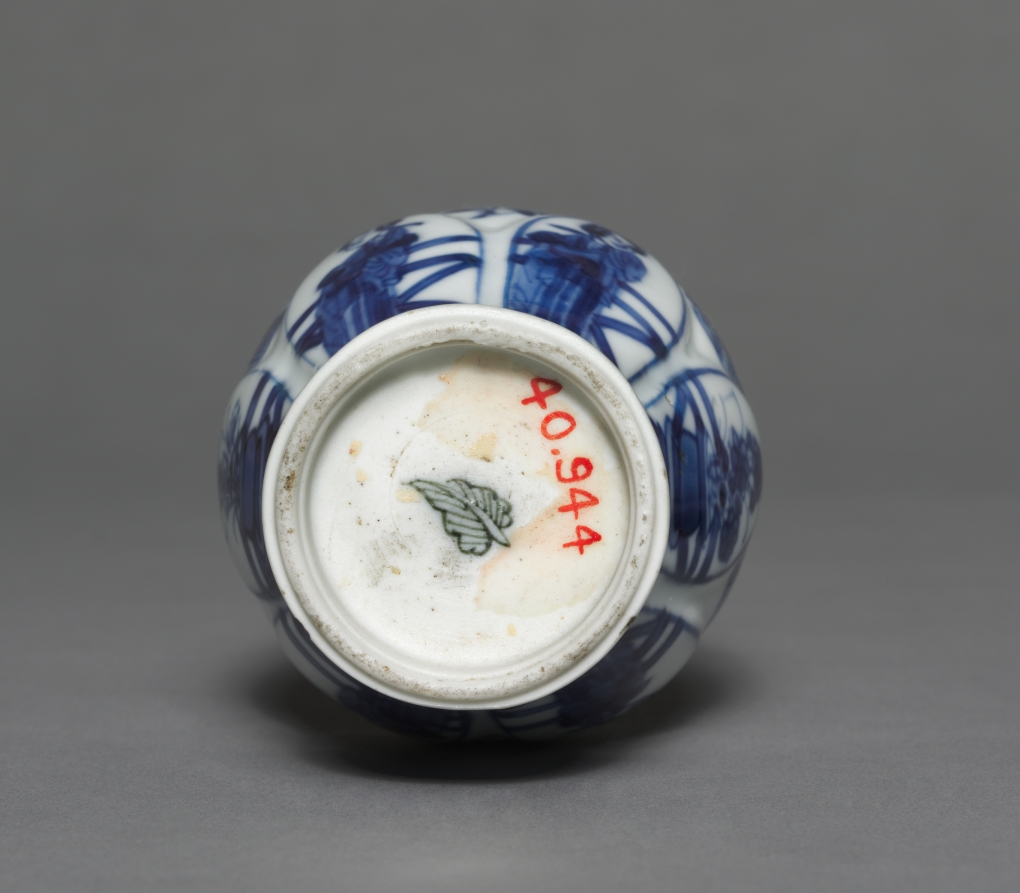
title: Vase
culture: China, Qing dynasty (1644-1911), Daoguang reign (1821-1850) - Xianfeng reign (1851-1861)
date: 19th Century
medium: porcelain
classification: Ceramic